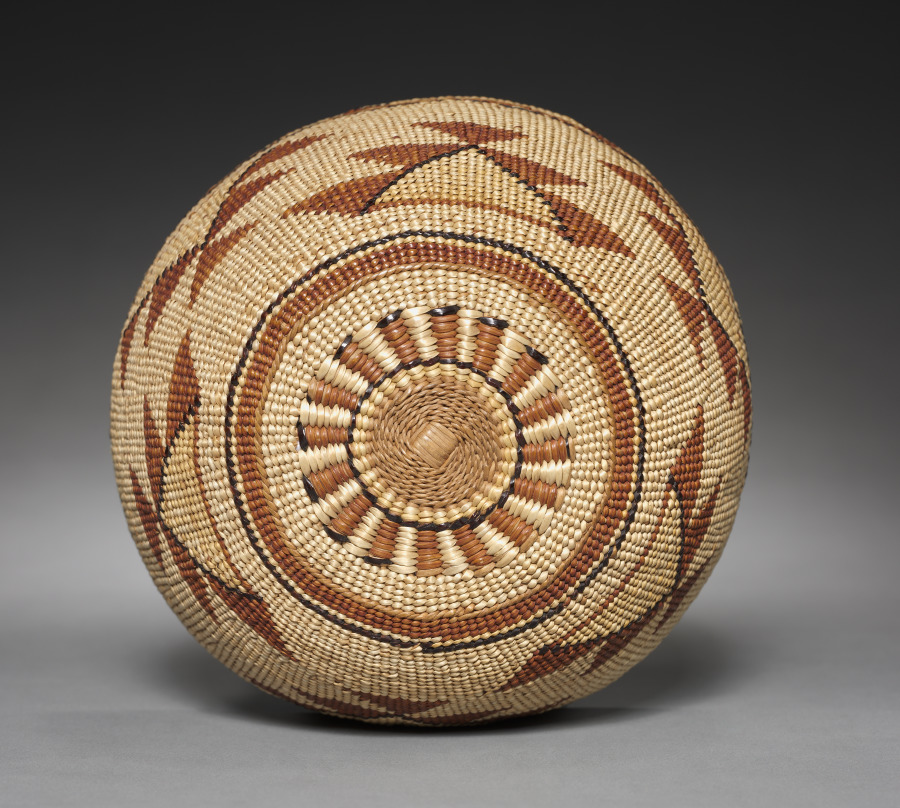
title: Hat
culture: California, late 19th- early 20th century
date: c 1875–1917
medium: plain-twined hazel with decoration in beargrass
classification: Basketry